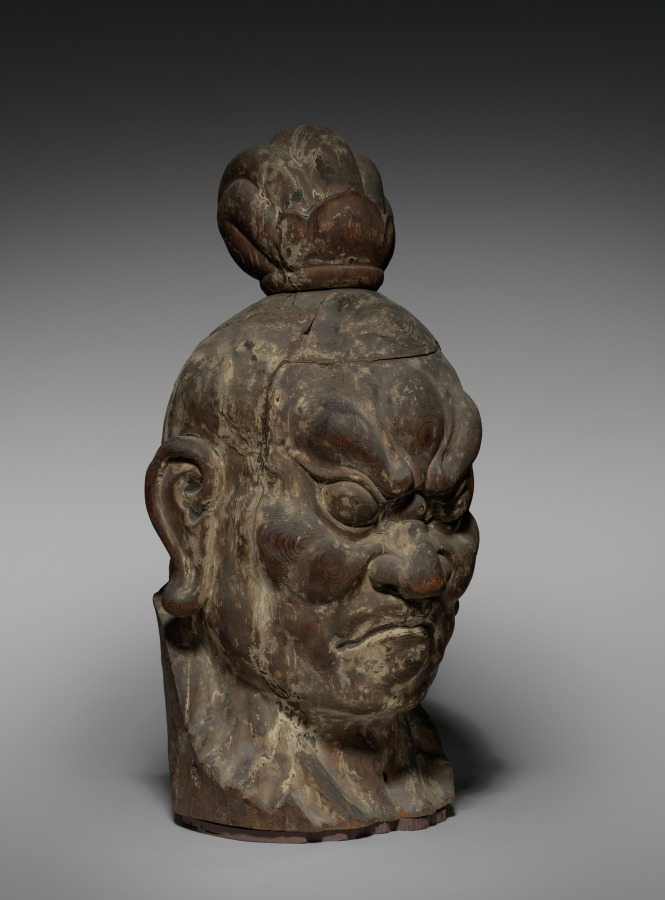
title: Head of Ni-o with Closed Mouth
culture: Japan, Kamakura period (1185–1333)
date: 1200s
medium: wood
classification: Sculpture